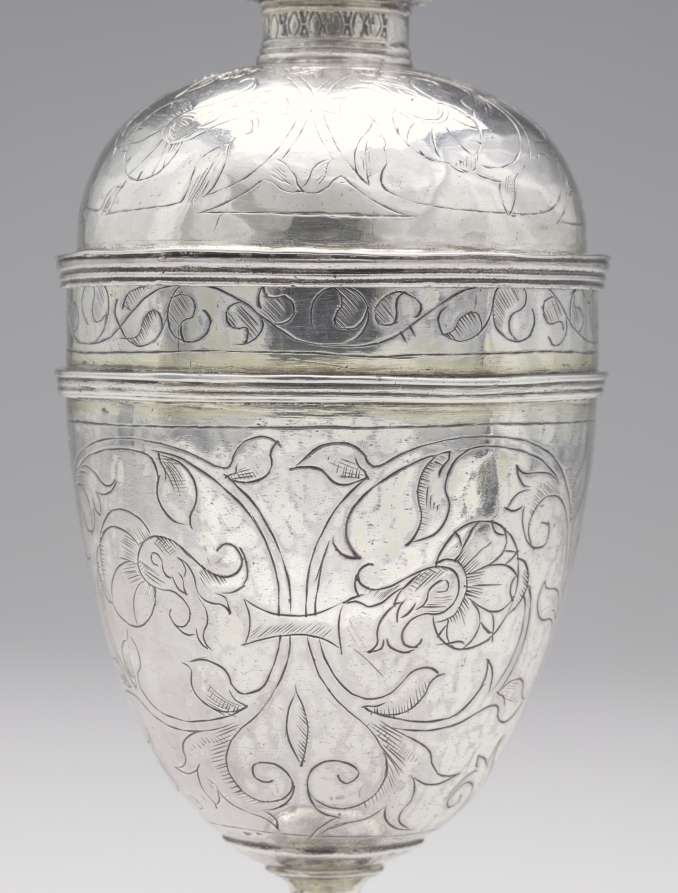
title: Standing Cup and Cover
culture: London, England, late 16th century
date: 1593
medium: silver, partially gilt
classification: Silver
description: Produced during the last years of the Tudor dynasty (1485–1603), this vessel exemplifies the symmetrical patterns, horizontal designs, and clear division of space typical of English silverwork at the time. The functional shape and ornamental designs characteristic of standing cups made them ideal for ceremonial occasions.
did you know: Often made for members of guilds and trade associations in London, standing cups were frequently used during toasts.